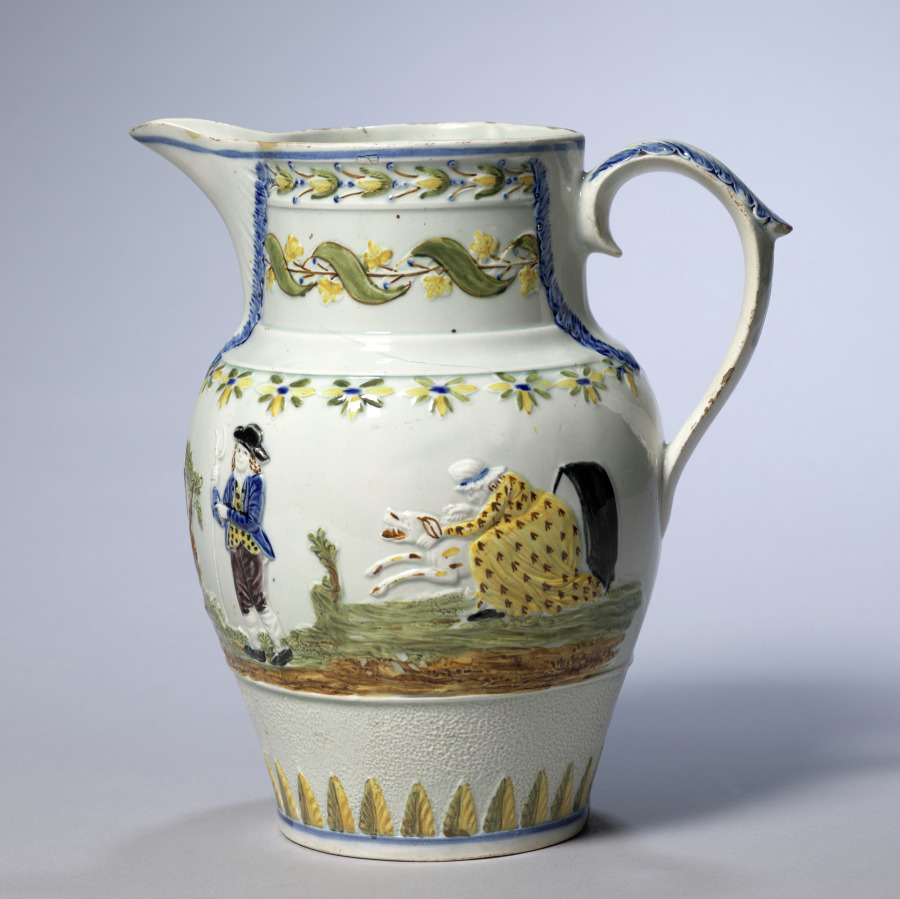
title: Jug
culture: England, Staffordshire, late 18th-early 19th Century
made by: Staffordshire Factory (British)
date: c. 1800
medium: earthenware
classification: Ceramic